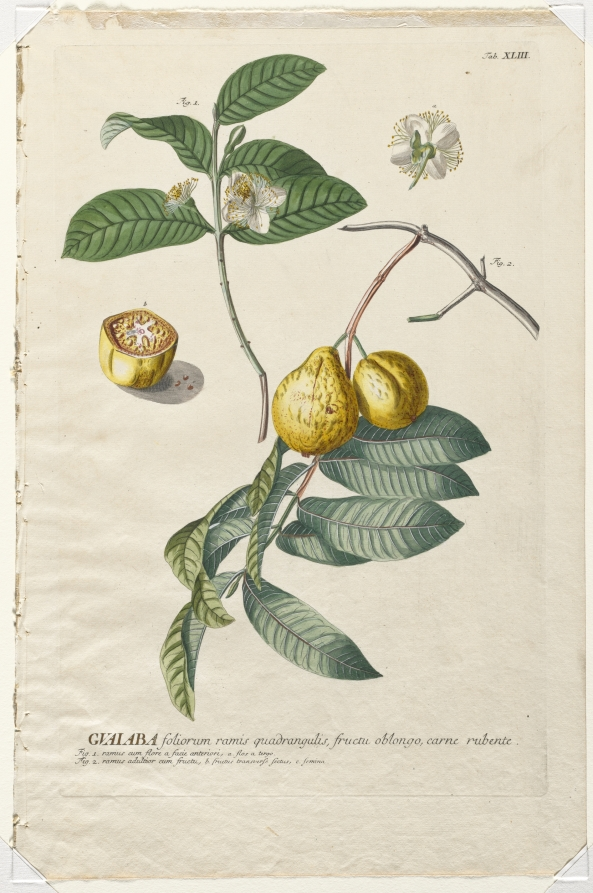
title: Plantae Selectae: No. 43 - Guaiaba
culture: Germany, 18th century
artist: Georg Dionysius Ehret (German, 1708–1770)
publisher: Christopher Jacob Trew (German, 1695–1769)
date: published 1750–73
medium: engraving, hand-colored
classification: Print